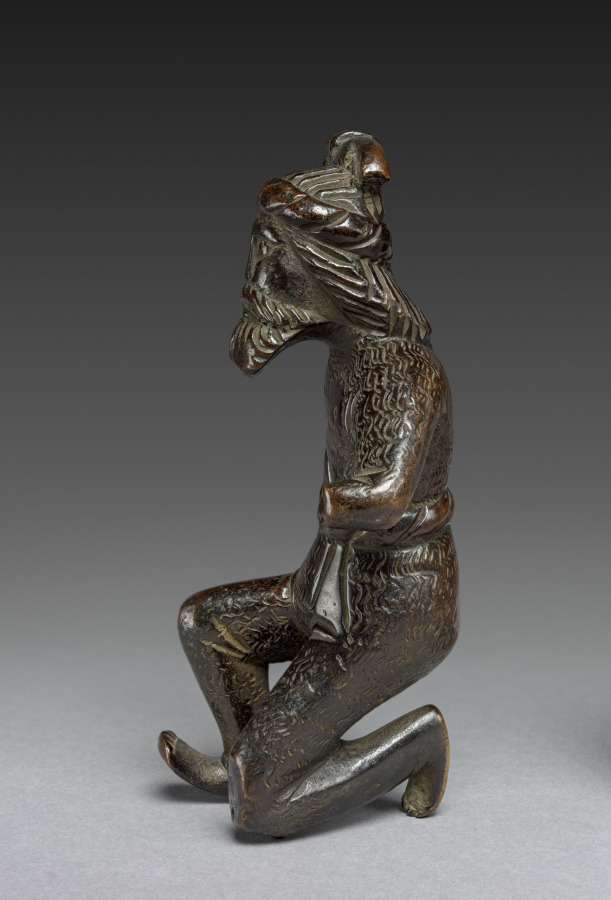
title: Wild Man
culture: Germany, Nuremberg(?)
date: late 1400s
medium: copper alloy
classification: Sculpture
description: Common in medieval art, the wild man is humanlike in appearance with long shaggy hair over his entire body and typically carries a club. Living at the fringe of society in woodland areas, wild men symbolized man in his natural, uncivilized state. Perhaps derived from the part-man part-beast satyr of antiquity, the wild man symbolized lust and aggression in contrast to the spiritual love embodied in medieval chivalry. This bearded version is shown kneeling while raising his right arm holding a club. He wears a twisted cloth circlet on his head and a similar belt at the waist. It has been suggested that this sculpture originally formed part of a suspended candelabra. It may also have served as support for large metal vessels.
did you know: The wild man is derived from the Greek satyr who lived in the woods.